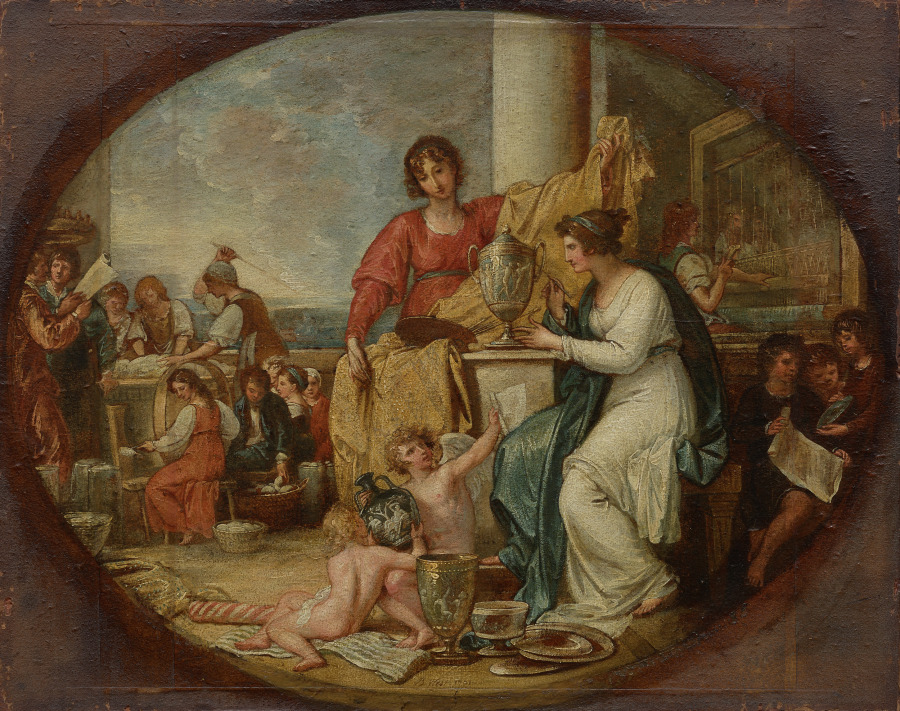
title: British Manufactory; A Sketch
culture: America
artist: Benjamin West (American, 1738–1820)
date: 1791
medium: oil on paper mounted on wood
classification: Painting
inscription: signed lower center: B. West 1791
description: As part of his work for the British court, Benjamin West produced several compositions celebrating the strength of the nation's economy. In this example, women in classical costumes paint vases, spin, and weave—a comparison of British manufacturing with the accomplishments of antiquity. One of a series of nine related sketches, this design was copied as a large mural decorating the Queen's Lodge at Windsor Castle, a room eliminated by remodeling in 1823.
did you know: Benjamin West was the first American artist to attain international fame.